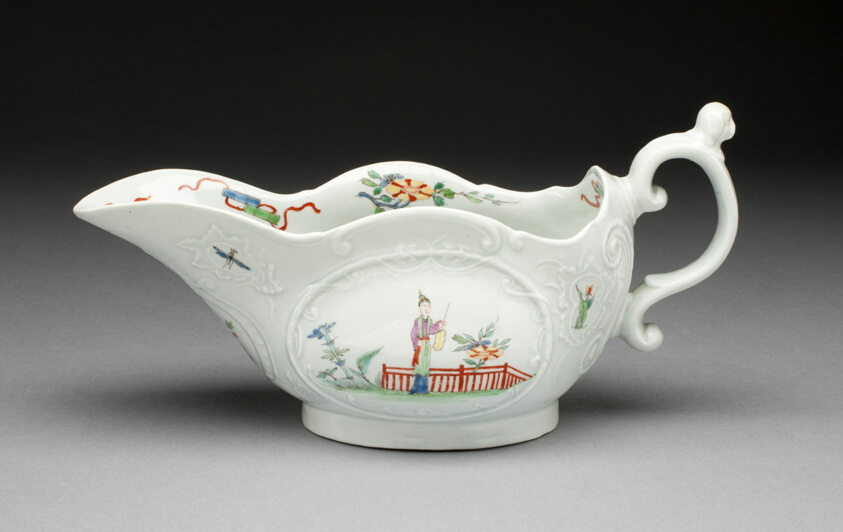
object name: Ceramics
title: Sauceboat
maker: Worcester Porcelain Factory (Warmstry House Period, 1751–1783); Worcester, England, founded 1751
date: c. 1755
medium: Soft-paste porcelain with polychrome enamels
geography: Worcester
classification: ceramics; tableware; porcelain; european decorative arts